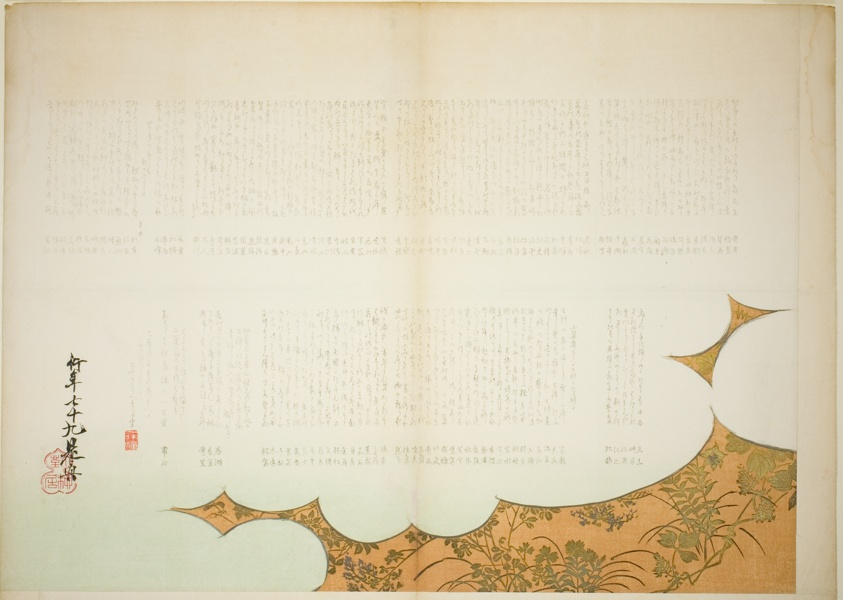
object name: Print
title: Clouds of Prince Genji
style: Japanese (culture or style)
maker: Shibata Zeshin (Japanese, 1807-1891)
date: summer 1885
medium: Color woodblock print; surimono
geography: Japan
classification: woodblock print; print; asian art